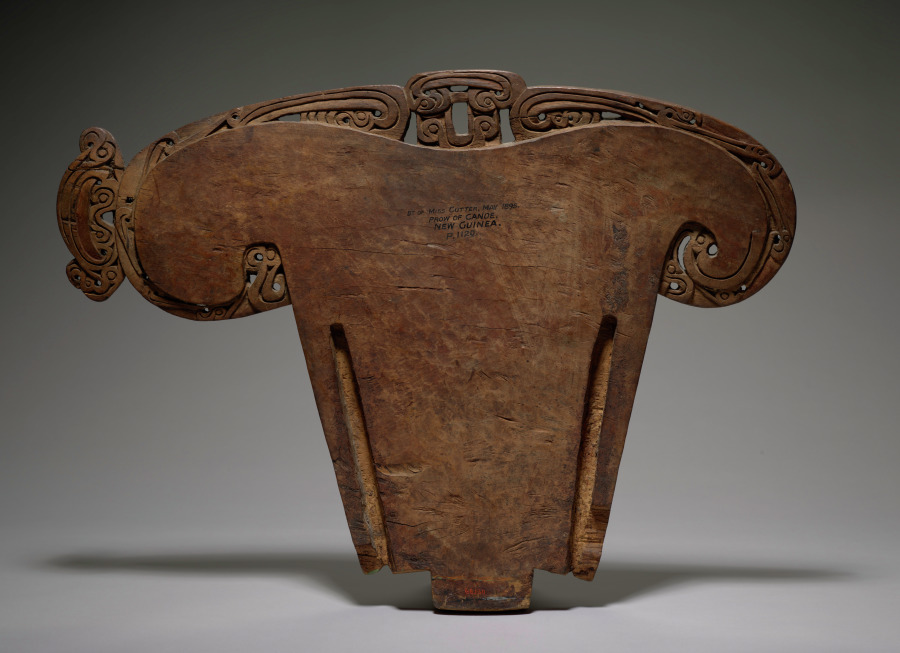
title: Canoe Splashboard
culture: Melanesia, Papua New Guinea, Massim Area, Trobriand Islands, 19th century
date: 1800s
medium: wood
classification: Sculpture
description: Trobriand Islanders often travel great distances by canoe to exchange ceremonial objects. Elaborately carved splashboards offered spiritual protection to the voyagers. Stylized frigate birds ornament this example.